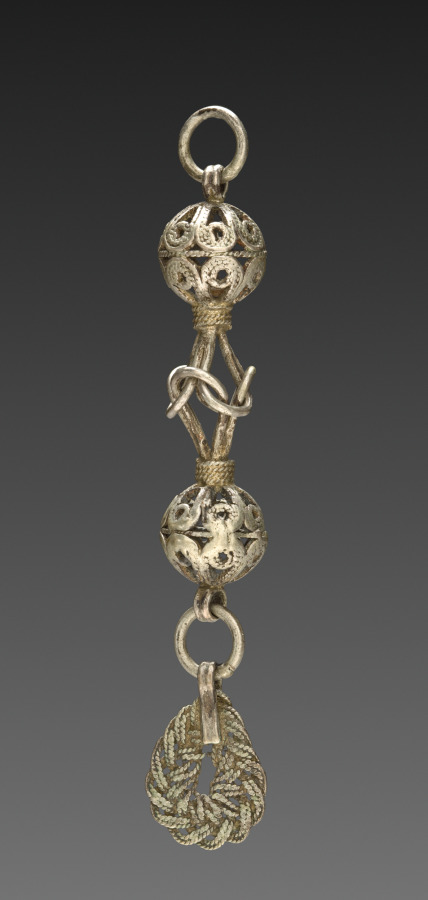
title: Button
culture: Balkans, 19th century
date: 1800s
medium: silver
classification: Jewelry